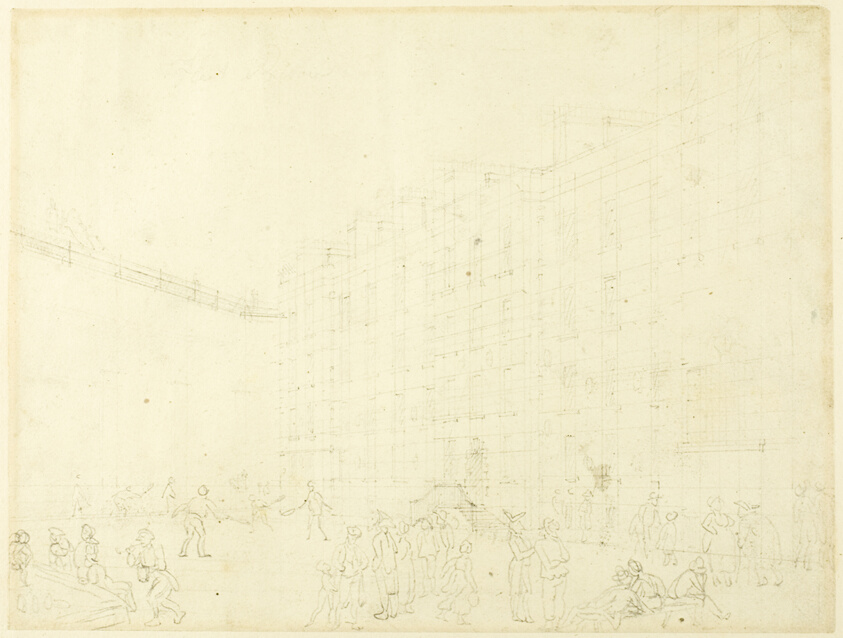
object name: Drawing and Watercolor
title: Study for Fleet Prison, from Microcosm of London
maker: Augustus Charles Pugin (English, born France, 1762-1832); Thomas Rowlandson (English, 1756-1827)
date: c. 1808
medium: Graphite on cream wove paper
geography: England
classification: graphite; drawings (visual works); prints and drawing